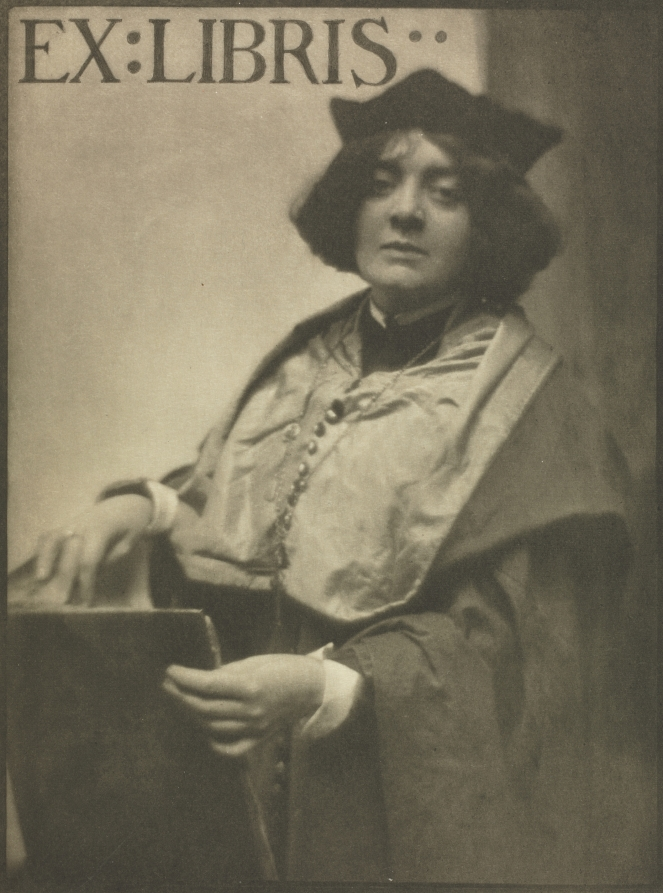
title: Camera Work: Ex Libris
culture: England, 20th century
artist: J. Craig Annan (British, 1864–1946)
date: 1909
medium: photogravure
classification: Bound Volume